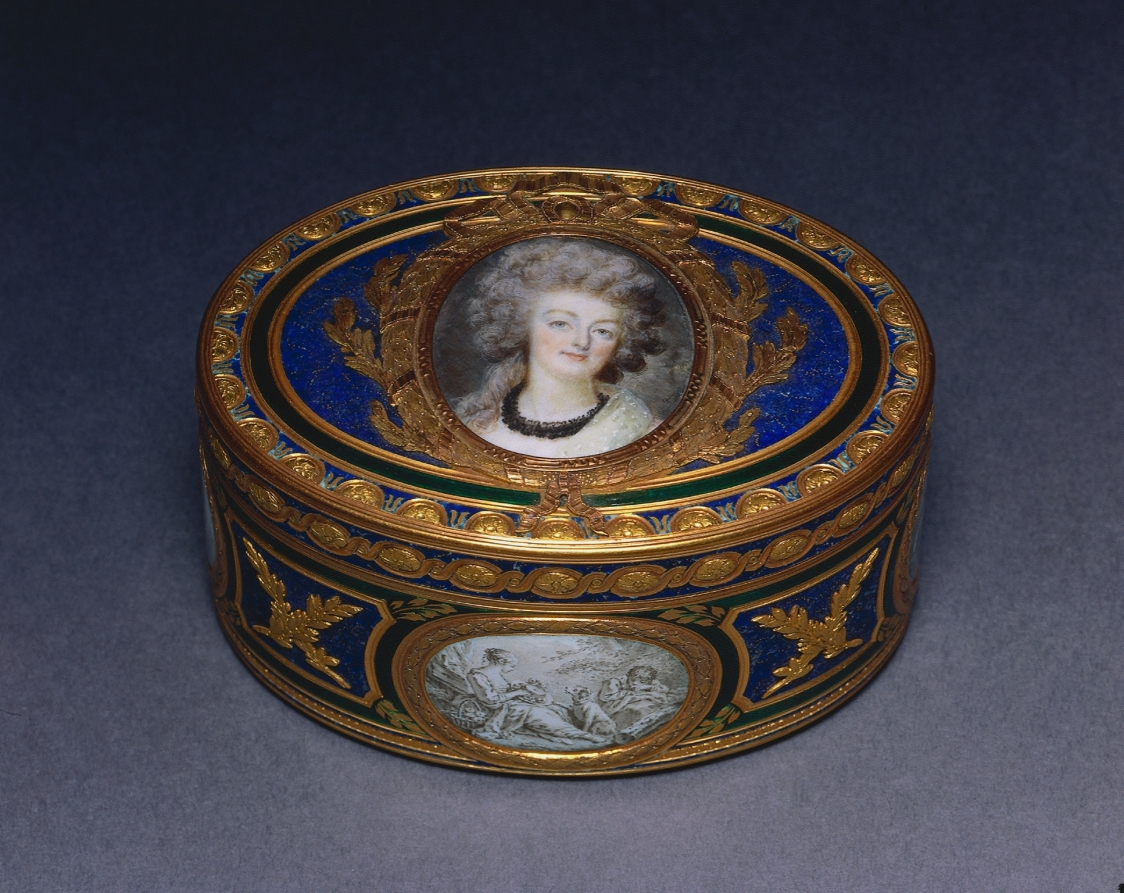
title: Snuff Box (Tabatière) with Portrait of Marie Antoinette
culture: France, 18th century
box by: Pierre-François-Mathis de Beaulieu (French)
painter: François Dumont (French, 1751–1831)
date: 1768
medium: watercolor on ivory in a gold and enamel box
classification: Enamel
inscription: [Maker's mark of Pierre-François-Mathis de Beaulieu, master goldsmith in 1768, inside cover]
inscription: [Charge mark of Jean-Jacques Prévot, 1762-1768, inside cover]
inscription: [Warden's mark of Paris, 1768-1769, inside cover]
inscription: [Discharge mark of Julien Alaterre, Paris, 1768-1774, on neck at right]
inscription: [Inside box, the letter]: "F"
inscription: [On bezel at left, engraved number]: "627"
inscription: [On front of bezel, engraved signature]: "Ve Georges Beaulieu à Paris"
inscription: [On right of miniature portrait, the letter]: "D"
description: This box was created through the collaboration of two skilled and well-known artisans of the period, master goldsmith Pierre-François-Mathis de Beaulieu and celebrated miniature painter François Dumont. The portrait of Marie Antoinette on the box's lid is painted in Dumont’s own style while those on the sides and bottom of the box take inspiration from the work of painter François Boucher, known for his pastoral scenes in the Rococo style.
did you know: Marie Antoinette, queen consort of French King Louis XVI and great patron of the decorative arts, was executed in 1793 at the end of the French Revolution.